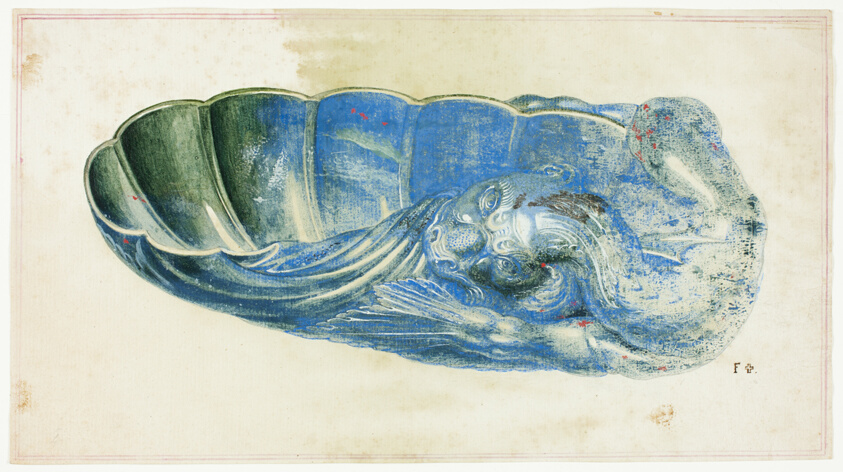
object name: Drawing and Watercolor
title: Blue and Green Shell with Dragon's Head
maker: Giuseppe Grisoni (Italian, born Flanders, 1699-1769)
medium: Gouache over black chalk, on ivory laid paper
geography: Flanders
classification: gouache; watercolor; drawings (visual works); prints and drawing